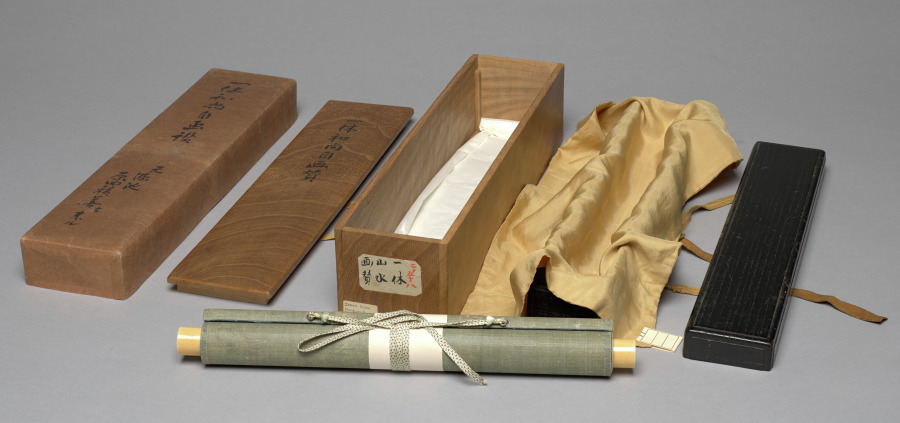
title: Listening to the Wind in the Pines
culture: Japan, Muromachi period (1392–1573)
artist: Ikkyū Sōjun (Japanese, 1394–1481)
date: 1400s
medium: hanging scroll; ink on paper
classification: Painting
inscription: 山居僧聴松風/何須臨済徳山禅一箇住山/三十年公案工夫了畢後/長松風静罷参眠 (transcribed by Trevor Menders with Zheng Xiaoying 2017, revised by Osvaldo Mercuri 2021)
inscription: 紫野龍寶門客东海純一休老和尚畫と詩一筆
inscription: 落款 一休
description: A monk sits in contemplation below an overhang covered with pine. The poem, titled "Monk in the Mountains Listening to the Wind in the Pines," refers to two Chinese Chan (Zen) Buddhist monks active in the ninth century. It may be translated as follows: Why must the Zen of Rinzai (Linji Yixuan) and Tokusan (Deshan Xuanjian) reside in a single temple for thirty years? Once he's solved his kōan, (the monk) ends his practice and falls asleep in the quietness of the wind among the tall pines. (translated by Osvaldo Mercuri) According to an inscription following the poem, both painting and verse were done by an eminent Japanese Buddhist monk known for revitalizing the Kyoto temple Daitokuji.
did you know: The word mountain, appearing in the title to the poem on this painting, can also refer to a temple.